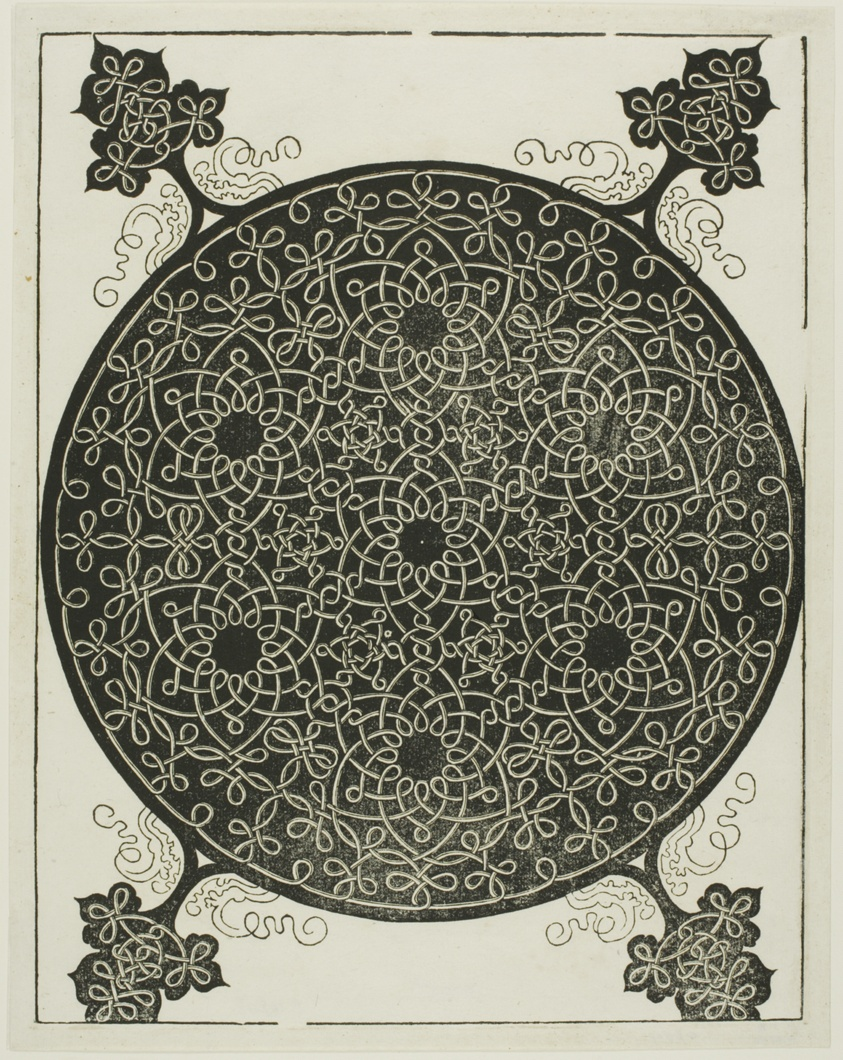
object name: Print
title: The Sixth Knot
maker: Albrecht Dürer (German, 1471-1528)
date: c. 1507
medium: Woodcut in black on ivory laid paper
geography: Germany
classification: woodcut; print; prints and drawing; paper